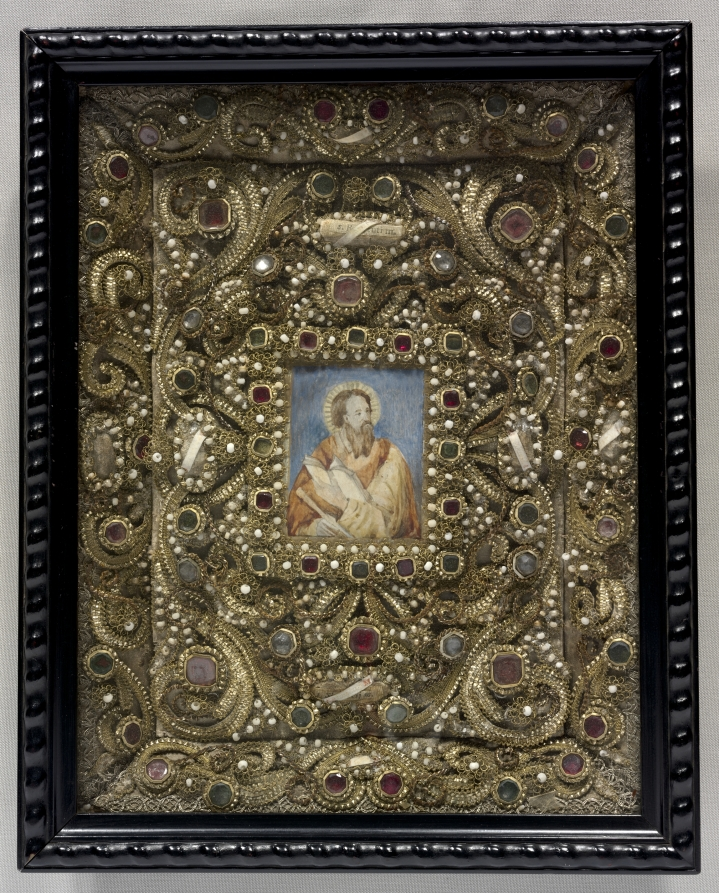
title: Reliquary Picture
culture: Spain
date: c. 1700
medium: metallic lace and galloon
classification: Miscellaneous